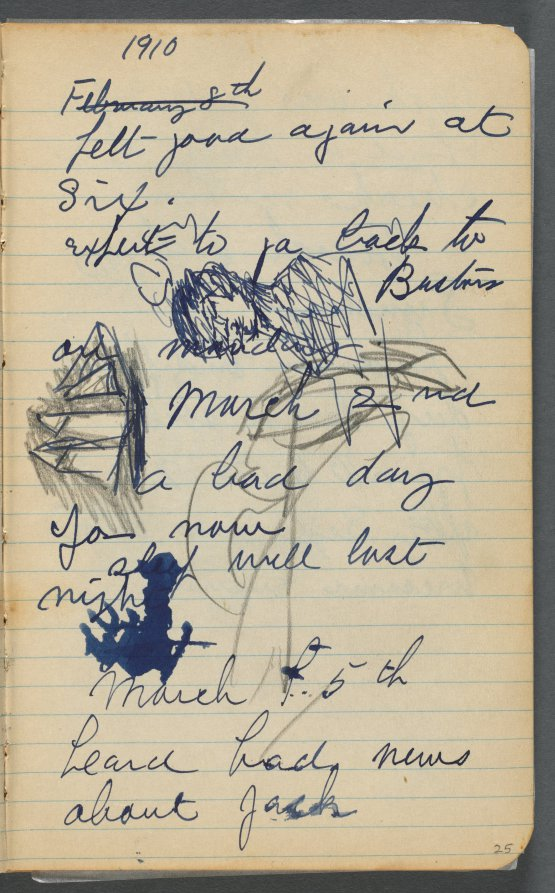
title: Sketchbook, page 025: Notes with Sailboats and Figures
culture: America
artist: Maurice Prendergast (American, born Newfoundland [now Canada], 1858–1924)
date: 1905–10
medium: graphite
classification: Bound Volume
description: This sketchbook contains 69 pages of drawings, a diary largely devoted to the state of the artist's health, and a three-page discourse on the nature of genius and ideas.